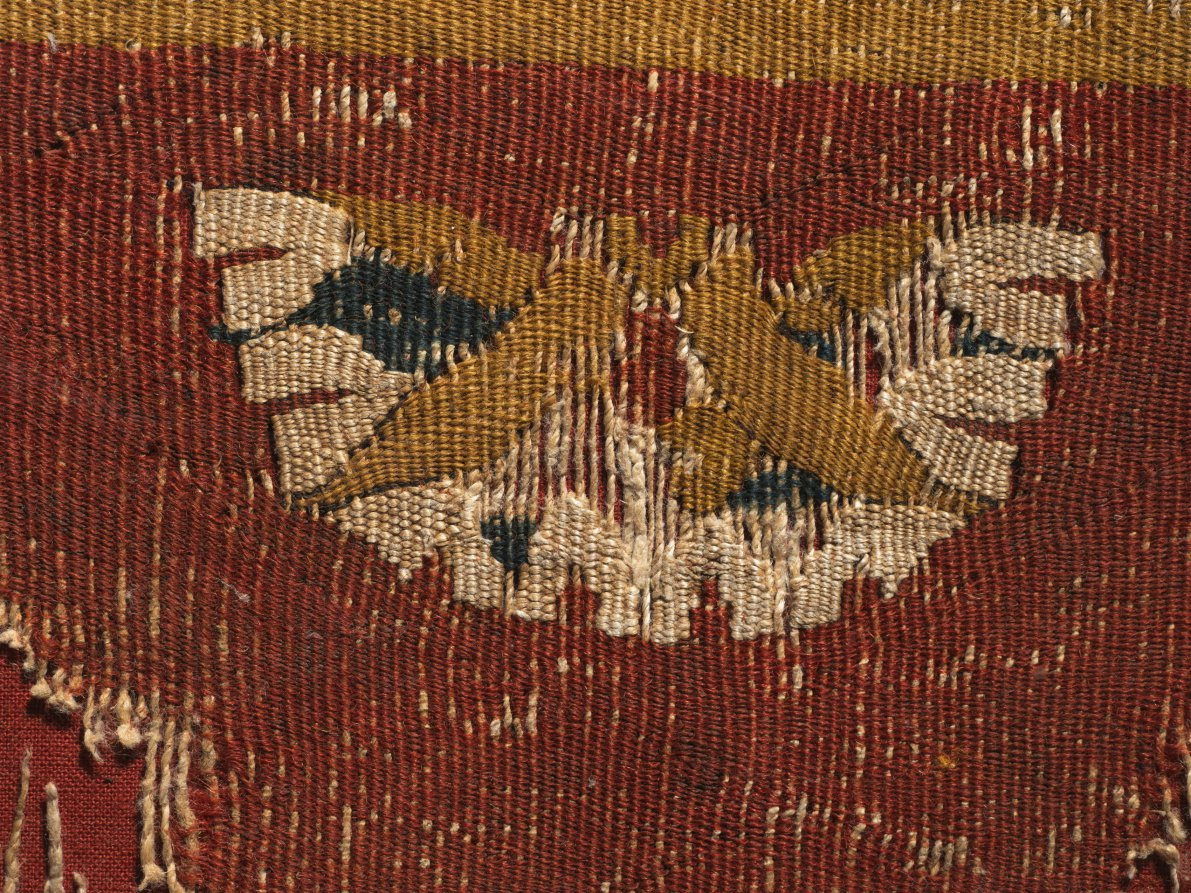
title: Pillow cover with Arabic inscription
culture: Egypt, al-Bahnasa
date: 800s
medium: Wool and linen: tapestry weave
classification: Textile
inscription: "In the name of God. Blessing from God to its owner. Of what was made in the tiraz."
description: This rare complete Egyptian pillow cover is a masterpiece of contrasting colors. Crimson and blue-green wool alternate in the ground and bird-inhabited roundels, supported by mustard-colored wool and undyed linen woven in tapestry weave. When folded down the center, based on examples from Egyptian burials, four birds form a unit on each side and are appropriately ascending in flight. Above, an Arabic text written in angular Kufic script reads, "In the name of God. Blessing from God to its owner. Of what was made in the tiraz." The word tiraz means factory or an Arabic-inscribed textile. This was probably made in al-Bahnasa, the city renowned for colorful wool textiles with figures, as they claimed, from a "gnat to the elephant."